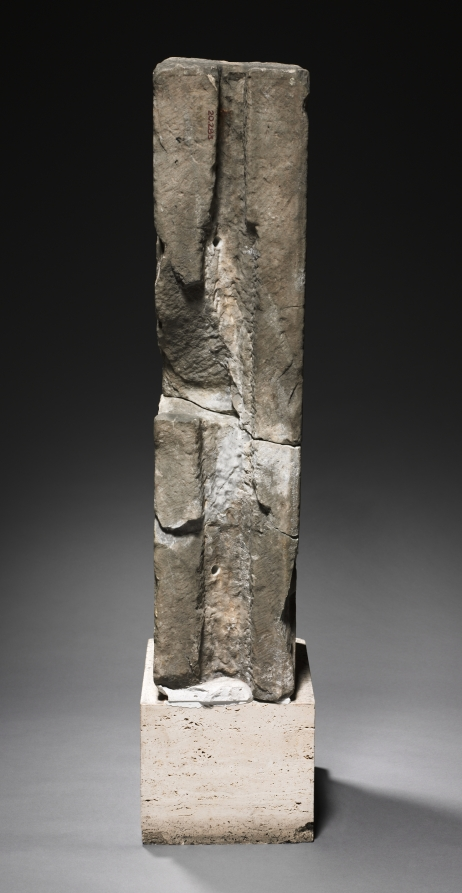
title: Transenna Post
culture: Lombardic, Italy, Rome, Migration period, 8th-9th Century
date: 700s–800s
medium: marble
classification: Sculpture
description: In Christian architecture a transenna is an openwork screen of stone or metal enclosing a shrine. These transenna elements were found in Rome; the posts were said to have been excavated on the Coelian Hill and may have originally formed part of the transenna of the Church of San Saba. The Lombards were an ancient Germanic-speaking tribe that settled in Italy after 568. Their artistic tradition was originally centered on small objects of personal adornment like buckles and brooches. After occupying Italy, the Lombards were in contact with large-scale sculpture of classical and early Christian origin that, by the end of the 700s, they had learned to adopt and imitate, as seen here.